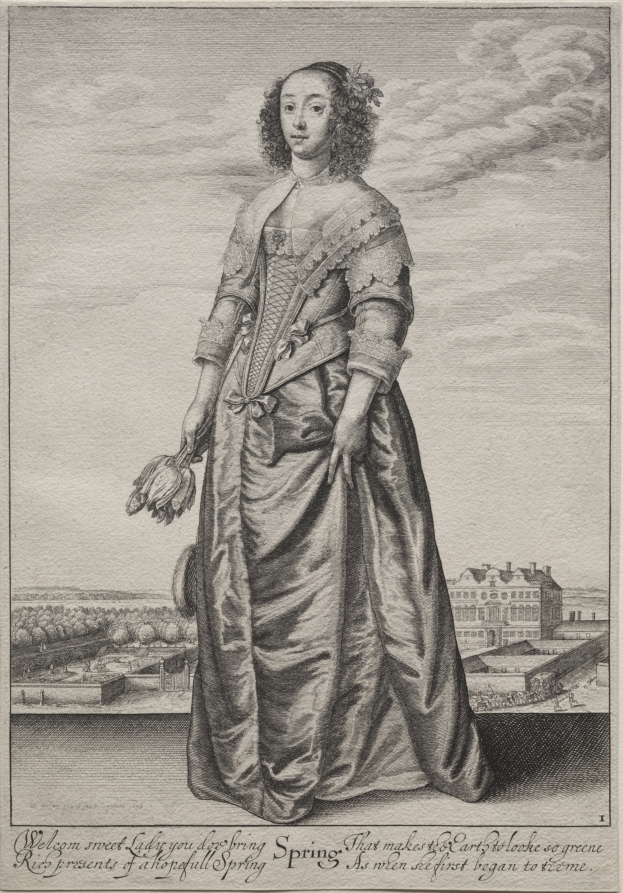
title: The Seasons: Spring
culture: Bohemia, 17th century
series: The Seasons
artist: Wenceslaus Hollar (Bohemian, 1607–1677)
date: 1643–1644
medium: etching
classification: Print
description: Increments of time, such as the seasons, were one of the most popular subjects for printed sets. Wenceslaus Hollar alone made six different versions. Hollar was a professional printmaker with over 3,000 prints to his credit. Born in Bohemia, he worked in Germany, London, and Antwerp. He came to London in 1636 while in the employ of the Earl of Arundel, an important collector that Hollar met in Germany. Apparently free to pursue independent projects, Hollar designed and etched this series around 1643–44. Here, each season is personified by elegantly clad ladies, appropriately dressed for their particular climate, with recognizable landmarks in and around London in the backgrounds. The inscriptions, in an older version of English, are slightly suggestive, in keeping with the lighthearted character of the imagery. The inscription reads: "Welcome sweet Lady you do bring / Rich presents of a hopeful Spring / That makes the Earth to look so green / As when she first began to teem."